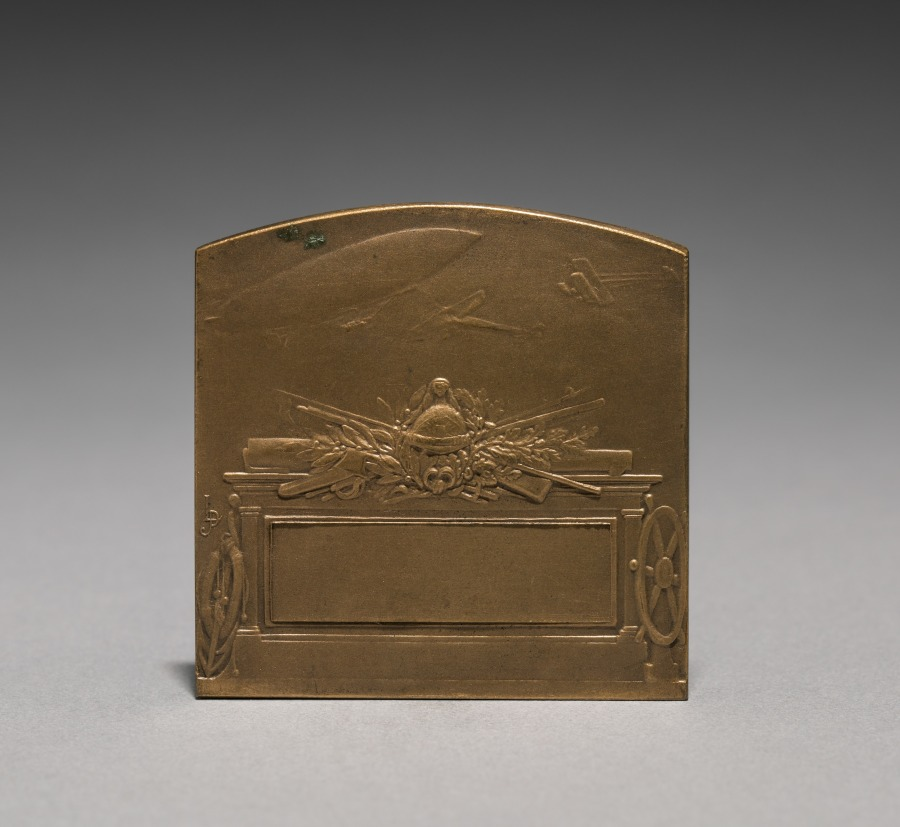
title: Medal (reverse)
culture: France, 19th century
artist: Jules Prosper Legastelois (French, 1855–1931)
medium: bronze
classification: Metalwork